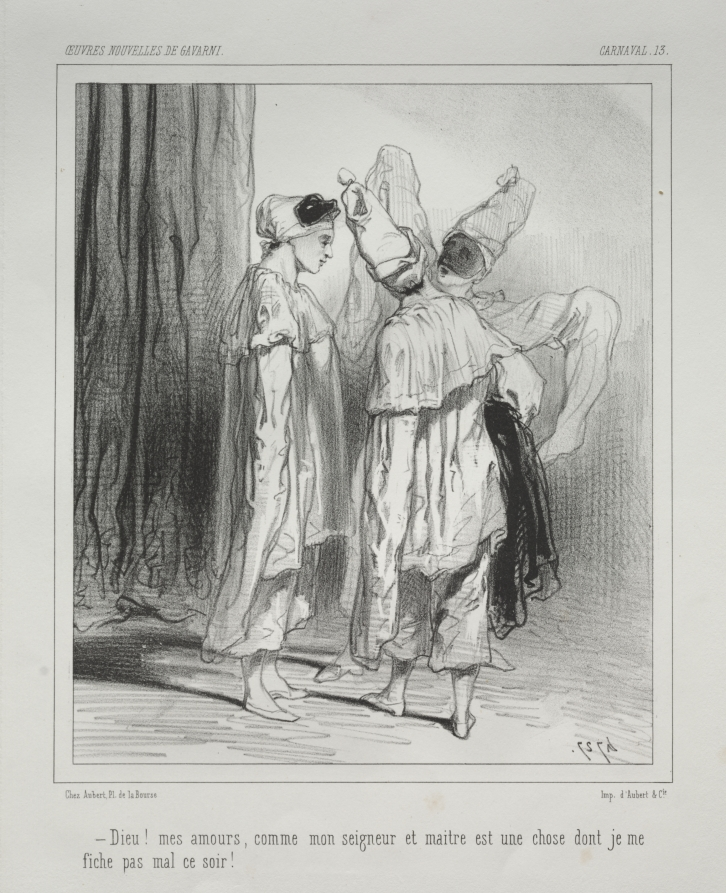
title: Carnaval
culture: France, 19th century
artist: Paul Gavarni (French, 1804–1866)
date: c. 1841–47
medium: lithograph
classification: Print